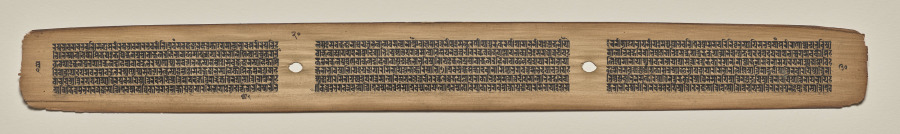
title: Text, Folio 20 (verso), from a Manuscript of the Perfection of Wisdom in Eight Thousand Lines (Ashtasahasrika Prajnaparamita-sutra)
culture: Eastern India, Bihar, Vikramashila Monastery. Painting: Nepal, Kathmandu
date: Sunday, September 14, 1119 (year 239 of the Newar Samvat in the month of Ashvina)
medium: gum tempera and ink on palm leaves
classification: Painting